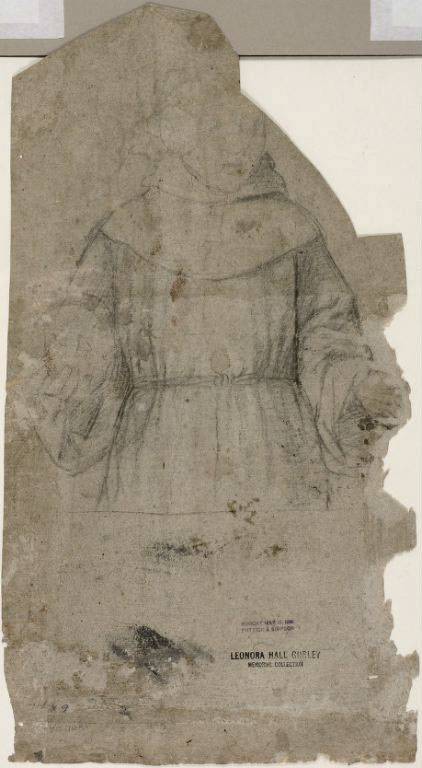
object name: Drawing and Watercolor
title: Saint Anthony of Padua (recto); Standing Monk (verso)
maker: Circle of Stefano dall'Arzere; Italian, c. 1515-1575/81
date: 1540/75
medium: Pen and brown ink with brush and brown wash, over black chalk (recto) and charcoal with traces of white chalk (verso) on gray laid paper, partially laid down on tan laid paper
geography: Italy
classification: drawings (visual works); prints and drawing